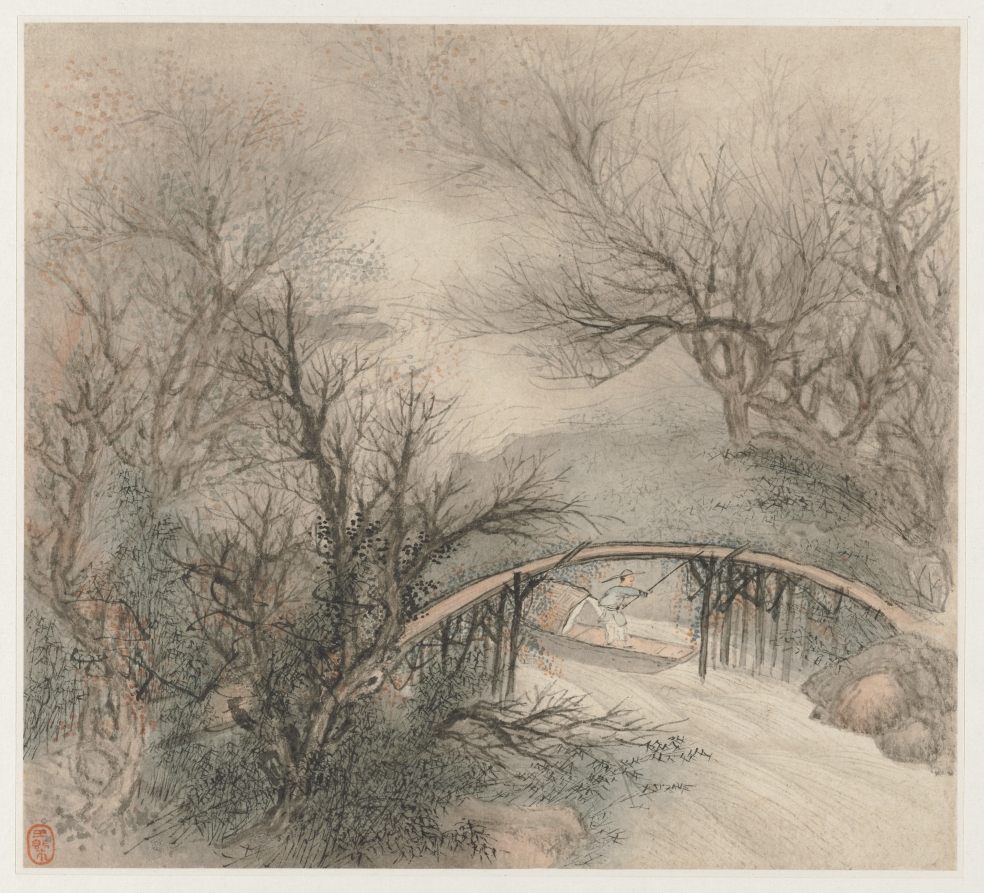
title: Album of Landscapes: Leaf 1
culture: China, Qing dynasty (1644-1911)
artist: Wang Gai (Chinese, active c. 1677–1705)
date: 1677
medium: album leaf, ink and light color on paper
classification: Painting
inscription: Poem by Shih-Jun-chang